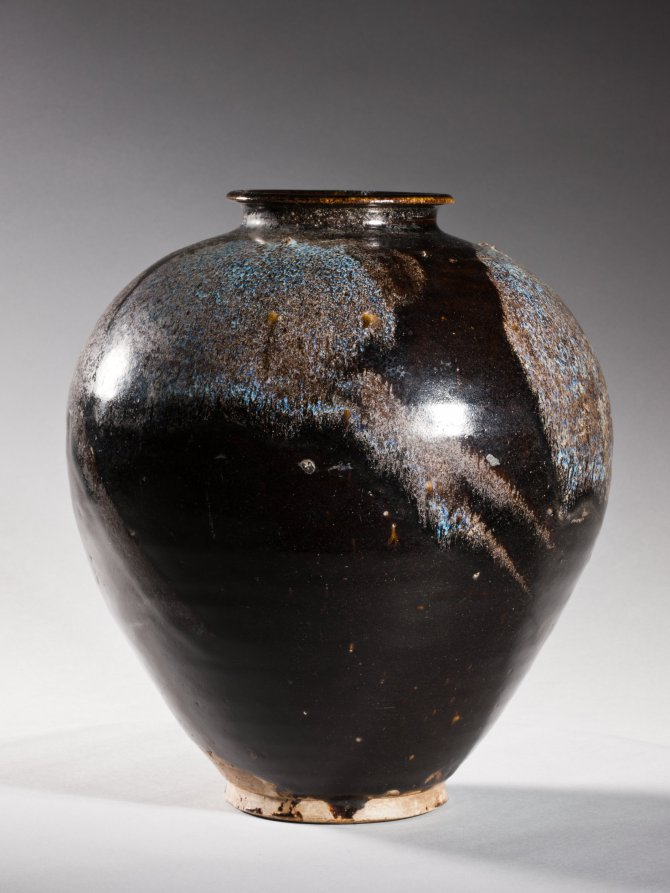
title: Jar: Black Ware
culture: China, Henan province, Huangdao kilns, Tang dynasty (618-907)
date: 700s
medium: glazed stoneware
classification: Ceramic